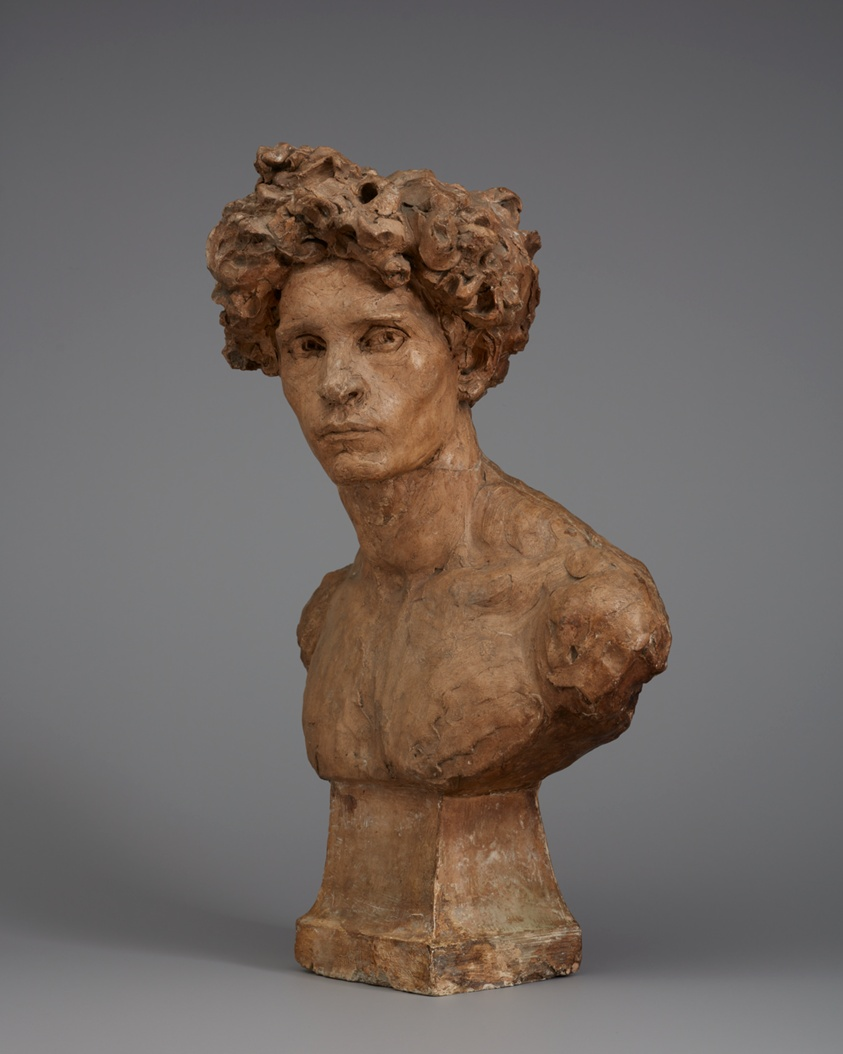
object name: Sculpture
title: Bust of a Young Man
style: nineteenth century, 19th century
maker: Aimé-Jules Dalou (French, 1838–1902)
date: 1877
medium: Patinated plaster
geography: France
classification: bust/head; sculpture; french; plaster; portrait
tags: portrait, portraits, portraits: male subject, man, busts, head